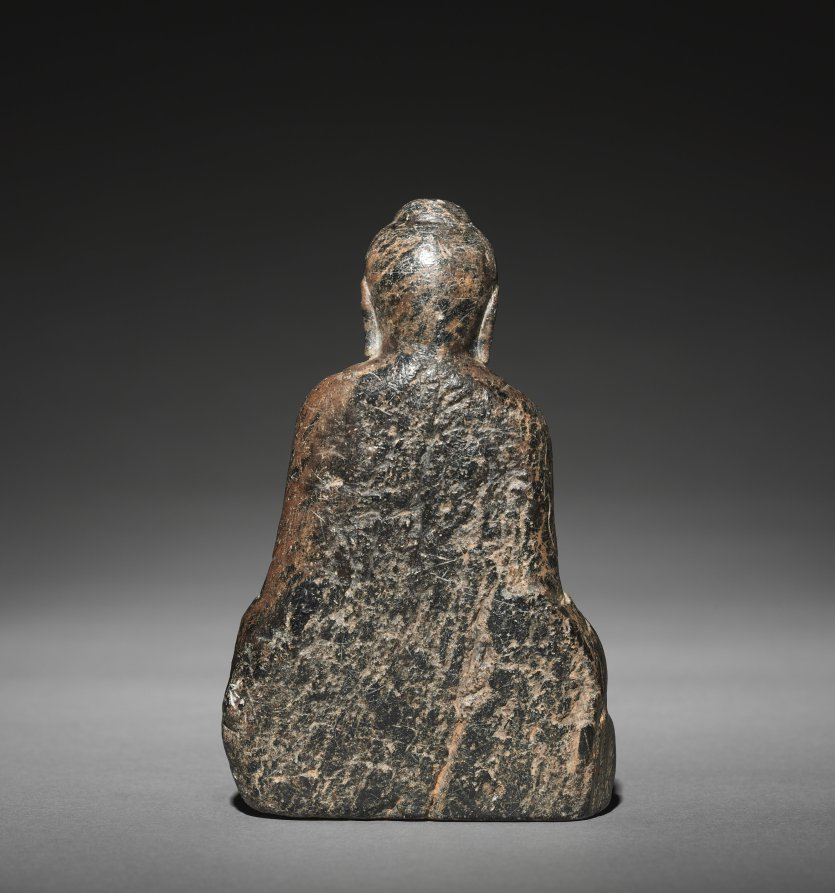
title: Seated Sakyamuni Buddha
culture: Korea, Three Kingdoms period (57 BCE–668 CE)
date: 500s–600s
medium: stone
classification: Sculpture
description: Created during the Unified Silla period, a high point of the spread of Buddhist teachings, this kind of miniature statue was often used as a portable object of devotion by traveling Buddhist monks. This particular Buddhist statue is very similar in style and size to the one in the collection of the National Museum of Korea. See it in the following link: https://www.museum.go.kr/site/main/relic/search/view?relicId=1926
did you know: This seated Buddhist deity is Shakyamuni, the founder of Buddhism.